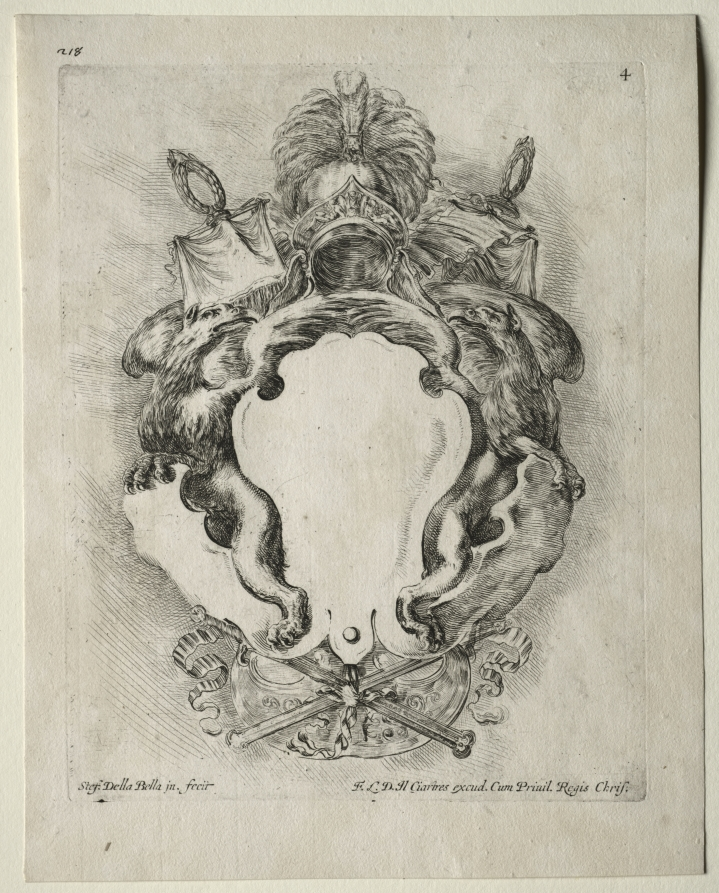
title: Collection of Various Caprices and New Designs of Cartouches and Ornaments: No. 4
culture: Italy, 17th century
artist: Stefano Della Bella (Italian, 1610–1664)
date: 1646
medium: etching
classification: Print